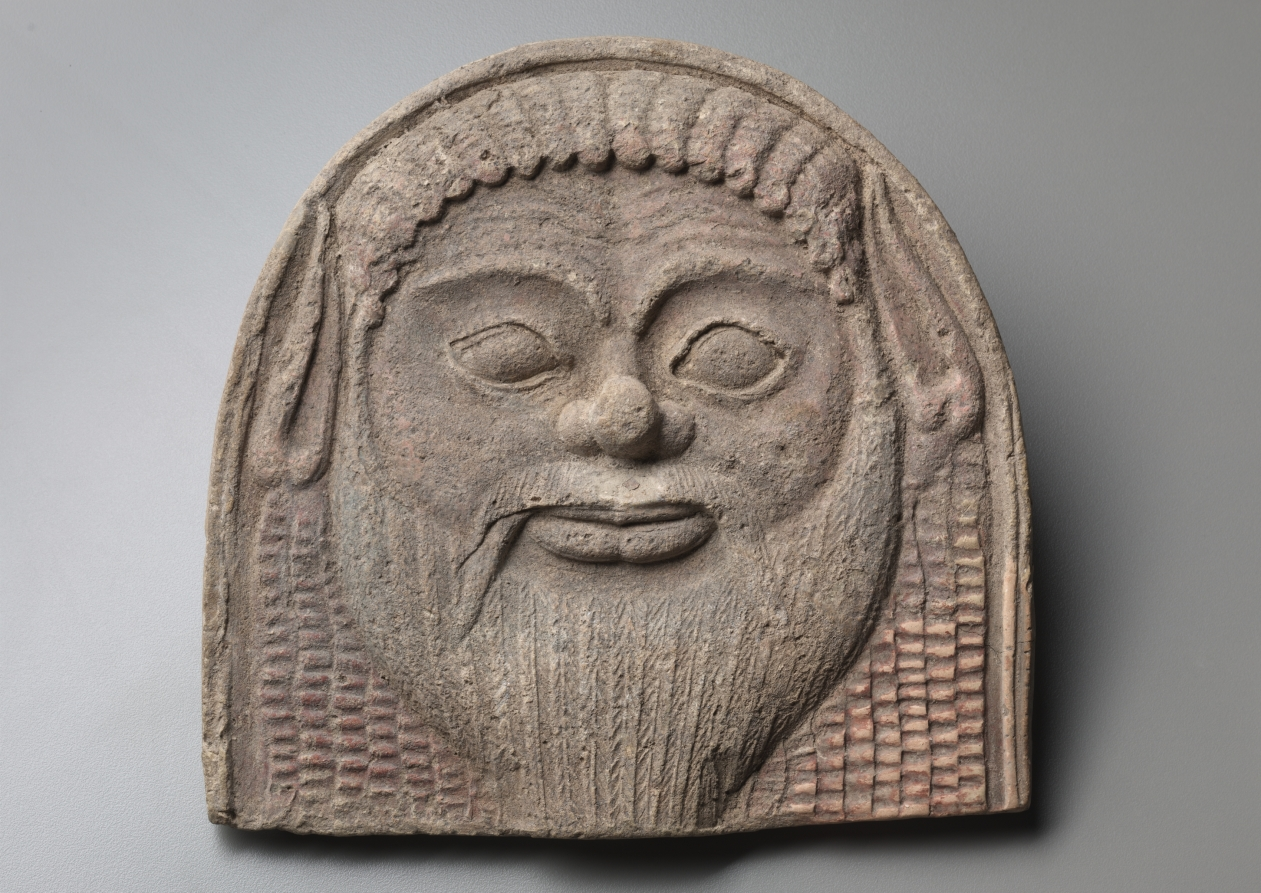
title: Antefix with Satyr Face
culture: Greek/South Italian, Taranto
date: c. 525–480 BCE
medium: terracotta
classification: Sculpture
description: This frontal satyr face, easily recognized by its snub nose and equine ears, served numerous purposes. As an antefix, it capped the open end of a roof tile, preventing wind, water, and pests from entering the building below. With its naturalistic mold-made features, enhanced with pigment and perhaps additional stamped and carved details, the antefix would also have provided striking visual ornament, especially when seen in long rows high above.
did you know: Despite the connections between satyrs and Dionysos, not all satyr-head antefixes belonged to Dionysian buildings.